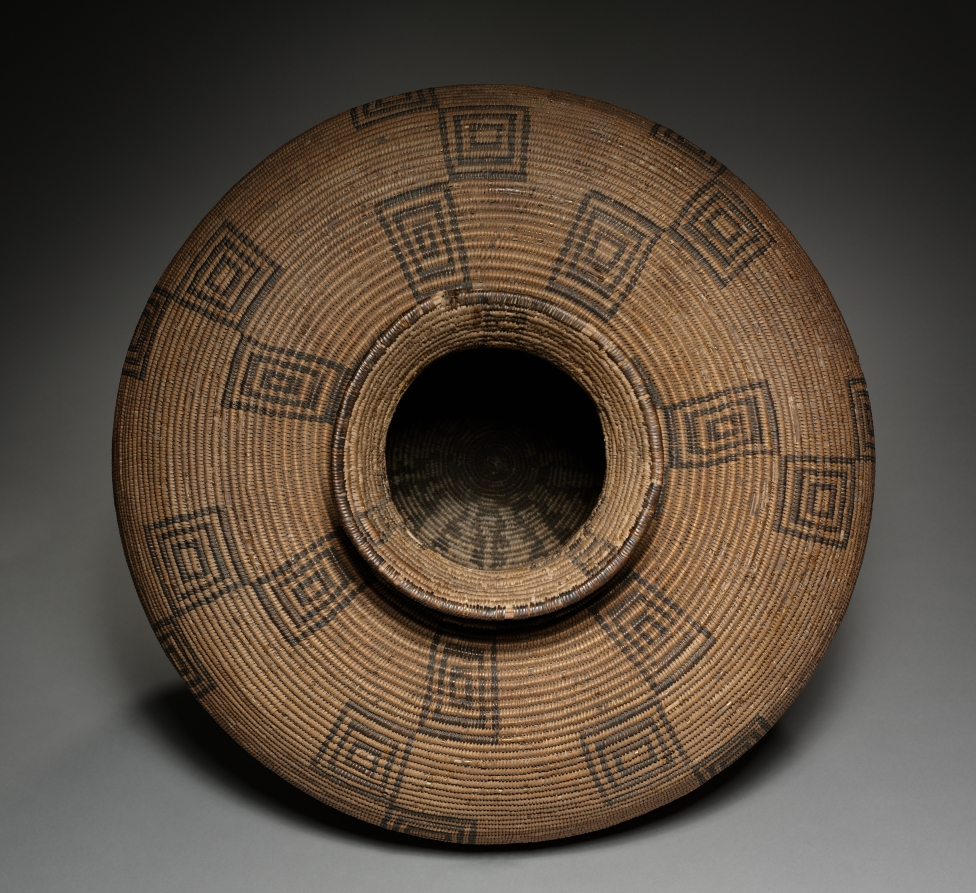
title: Grain Storage Basket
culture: Southwest, White Mountains, Arizona, Apache, 19th century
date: late 1800s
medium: coiled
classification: Basketry